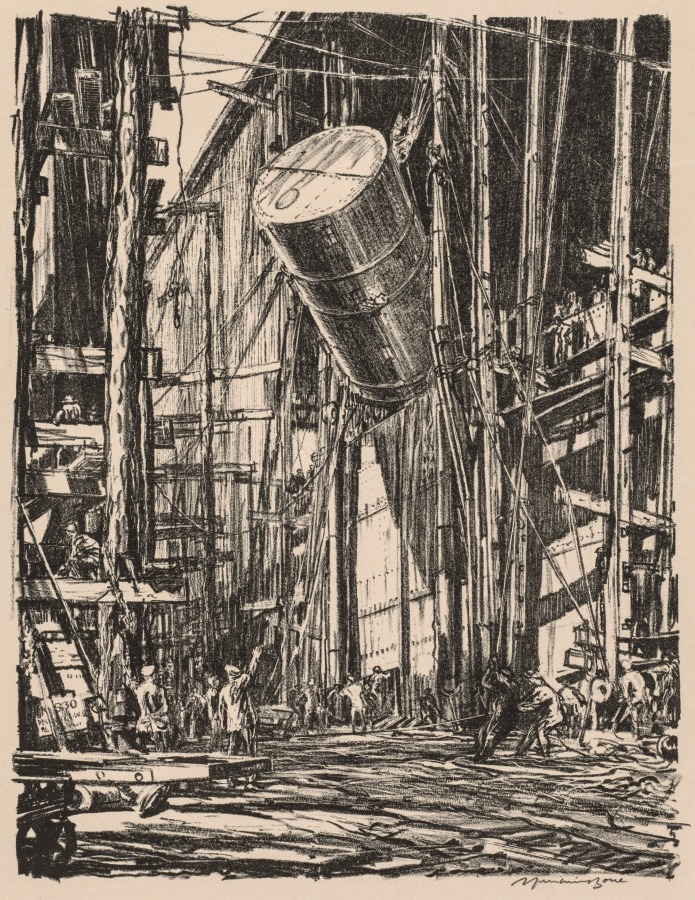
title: On the Clyde, 1917-1918: Lifting an Oil Tank into a Train Ferry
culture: England, 20th century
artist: Muirhead Bone (British, 1876–1953)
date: 1917–1918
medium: lithograph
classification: Print